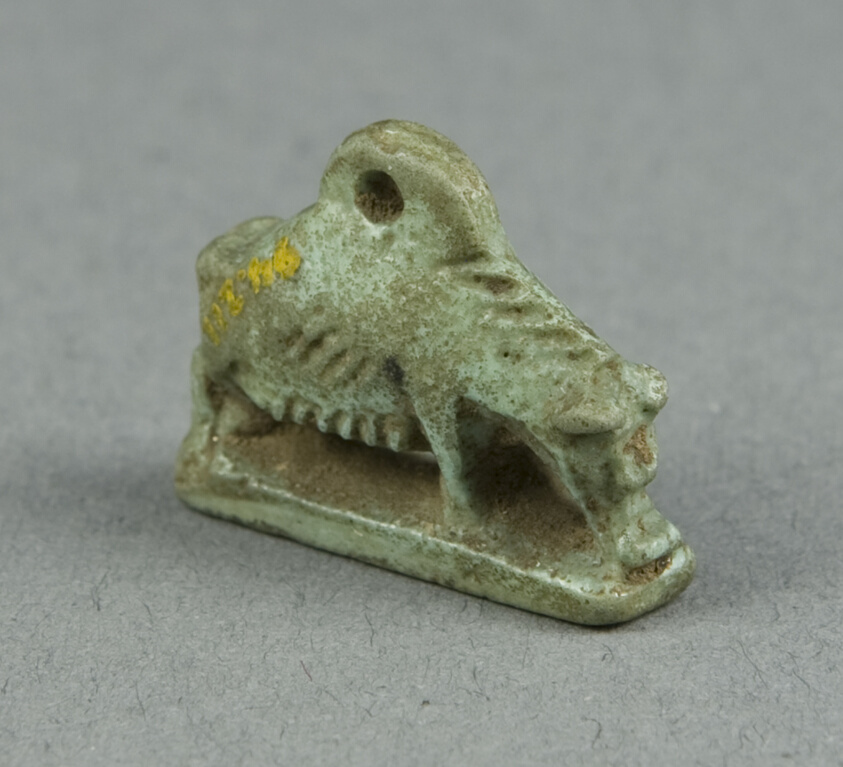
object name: Costume and Accessories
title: Amulet of a Sow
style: egyptian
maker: Egyptian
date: Third Intermediate Period–Late Period, Dynasties 21–31 (about 1069–332 BCE)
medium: Faience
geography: Egypt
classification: amulet; jewelry; ceramics; ancient art; costume; faïence (composite material)